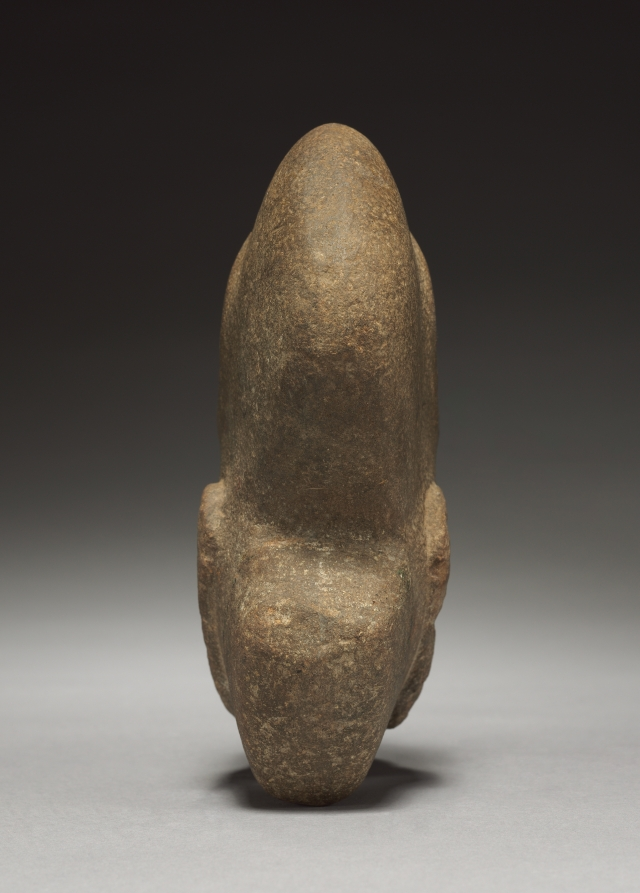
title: Ballgame Thin Stone Head (Hacha)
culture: Mesoamerica, Classic Veracruz style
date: 600–900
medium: stone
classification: Sculpture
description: This enigmatic head is associated with an ancient ballgame played both for sport and ceremonial purposes on Mexico’s Gulf Coast, in present-day Veracruz. It may represent an elite ballplayer or ballgame patron—the forehead is incised with interlaced designs similar to the so-called mat motif, a Maya symbol for rulership. Such heads are known as hachas (Spanish for “axe”) because they often taper to a thin edge at the front, giving them the appearance of axe heads.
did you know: The interlaced designs on this head’s forehead are similar to a Maya symbol for rulership.